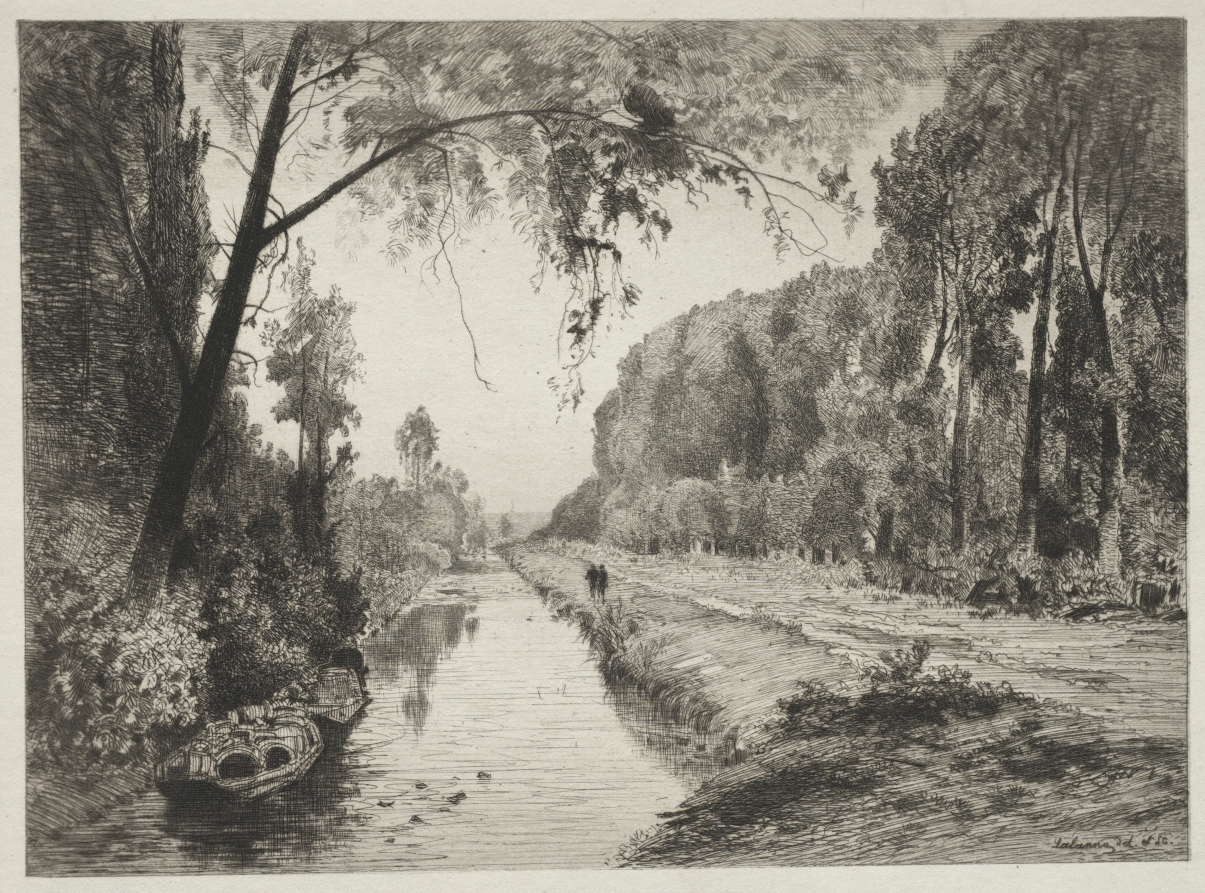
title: Canal at Pont Sainte-Maxence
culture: France, 19th century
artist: Maxime Lalanne (French, 1827–1886)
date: c. 1878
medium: etching on chine collé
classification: Print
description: Lalanne made an important contribution to the etching revival in mid-19th-century France. In 1862, he was one of the founders of the Etching Society (Société des Aquafortistes) with whom he published numerous landscape and architectural prints.